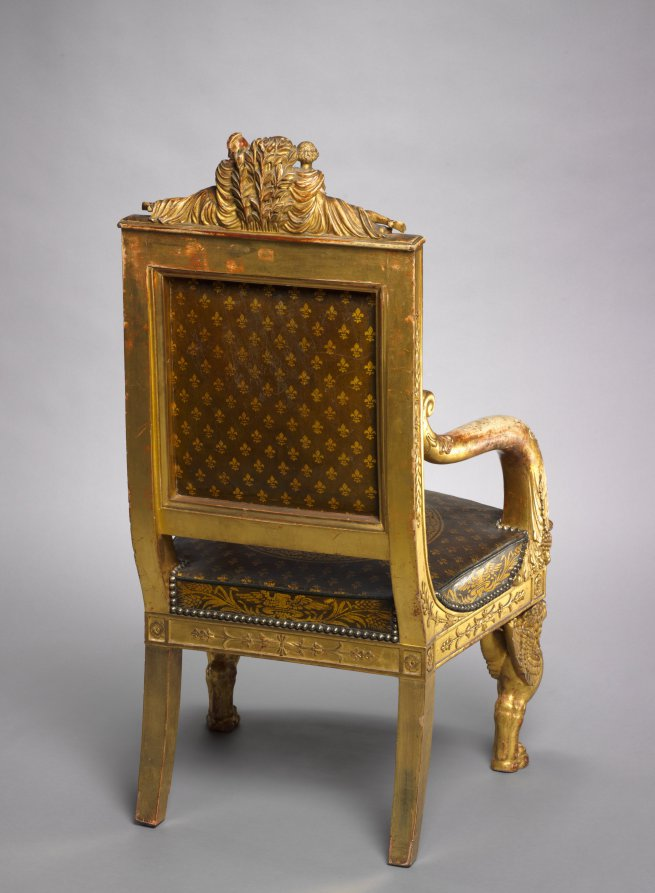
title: Child's Throne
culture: France, Paris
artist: Pierre-Marie Balny le Jeune (French, 1832)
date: 1822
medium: carved and gilded wood, leather upholstery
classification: Furniture and woodwork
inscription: inscribed with stencils inside back rail: BLONDEL TAPISSIER/RUE ST. ANTOINE N 72 1822 inscribed in ink lower edge back rail: 12 JANVIER 18[22?]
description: This chair was made for the young, presumed successor to the French throne who ruled briefly as Henri V in 1830, the last of the direct Bourbon line. He is depicted at the center of the top rail protected by female figures representing France and Minerva, the Roman goddess of wisdom. Fleurs-de-lis and the Gallic rooster, symbols of French royalty and the French people, decorate the upholstery.